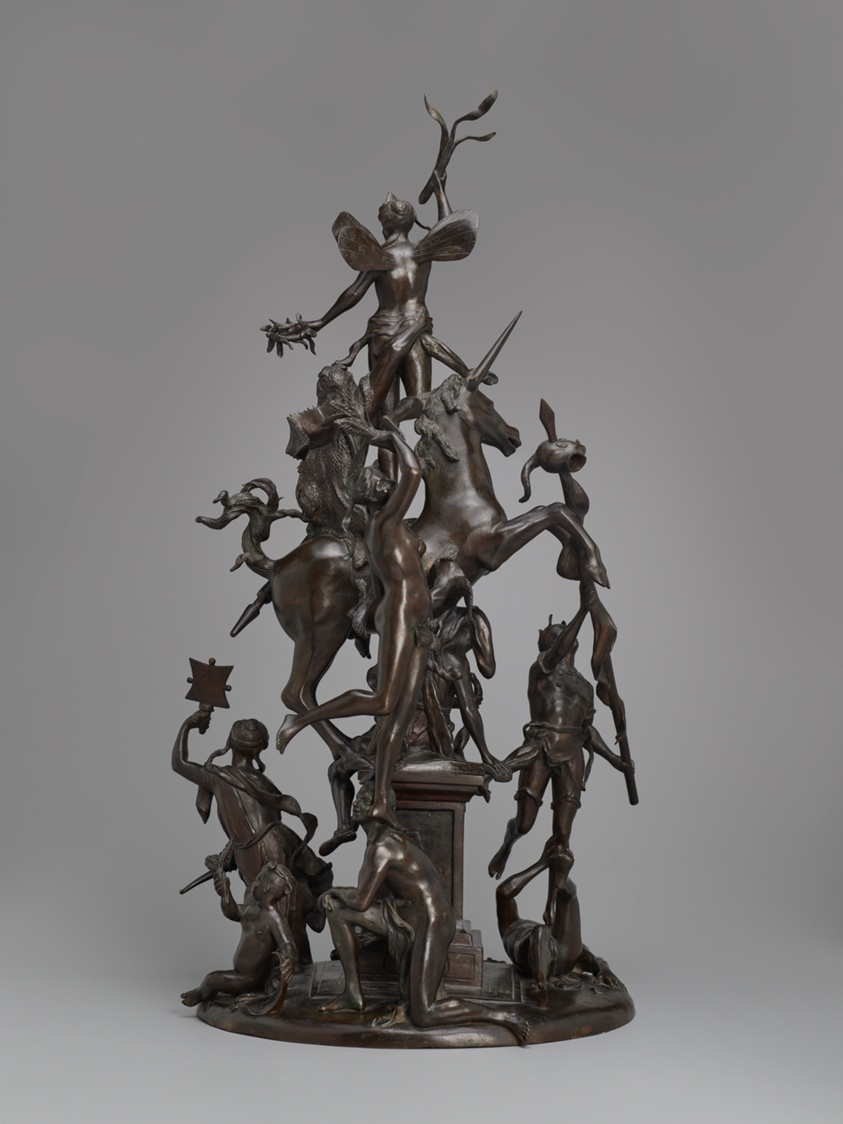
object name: Sculpture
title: Allegorical Group of Victory Supported by Valor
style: 18th Century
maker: Francesco Bertos (Italian, active c. 1693–1739)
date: 1700/10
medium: Bronze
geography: Italy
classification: statuette; Italian; sculpture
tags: victory, woman, weapons, unicorns, sculpture, nudes, mirror, men, laurel wreaths, head, crowns, children, animals